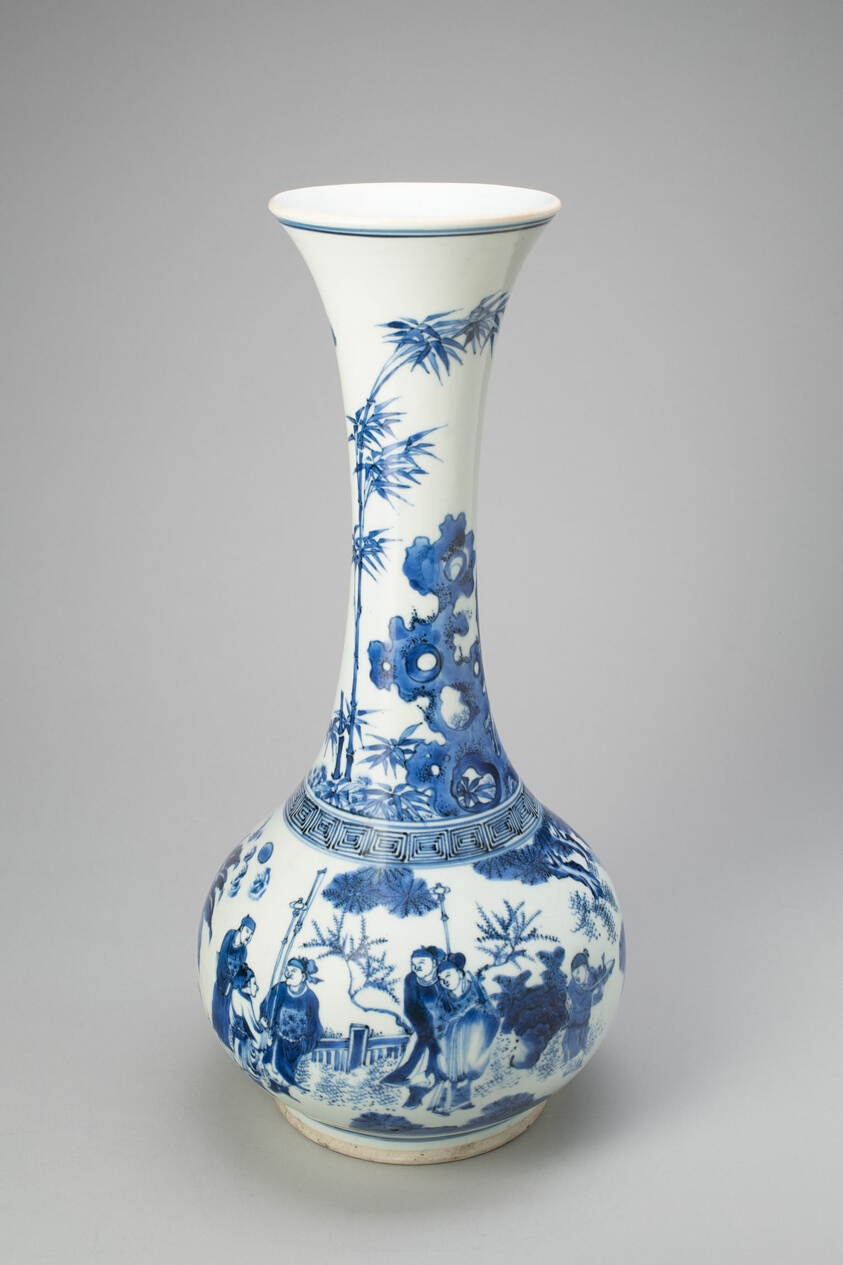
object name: Vessel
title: Bottle-Shaped Vase with Figures in Garden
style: Chinese (culture or style)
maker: China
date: Ming dynasty (1368–1644), Chongzhen period (1627–1644)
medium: Porcelain painted in underglaze blue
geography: China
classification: vase; porcelain; vessel; asian art; ceramics